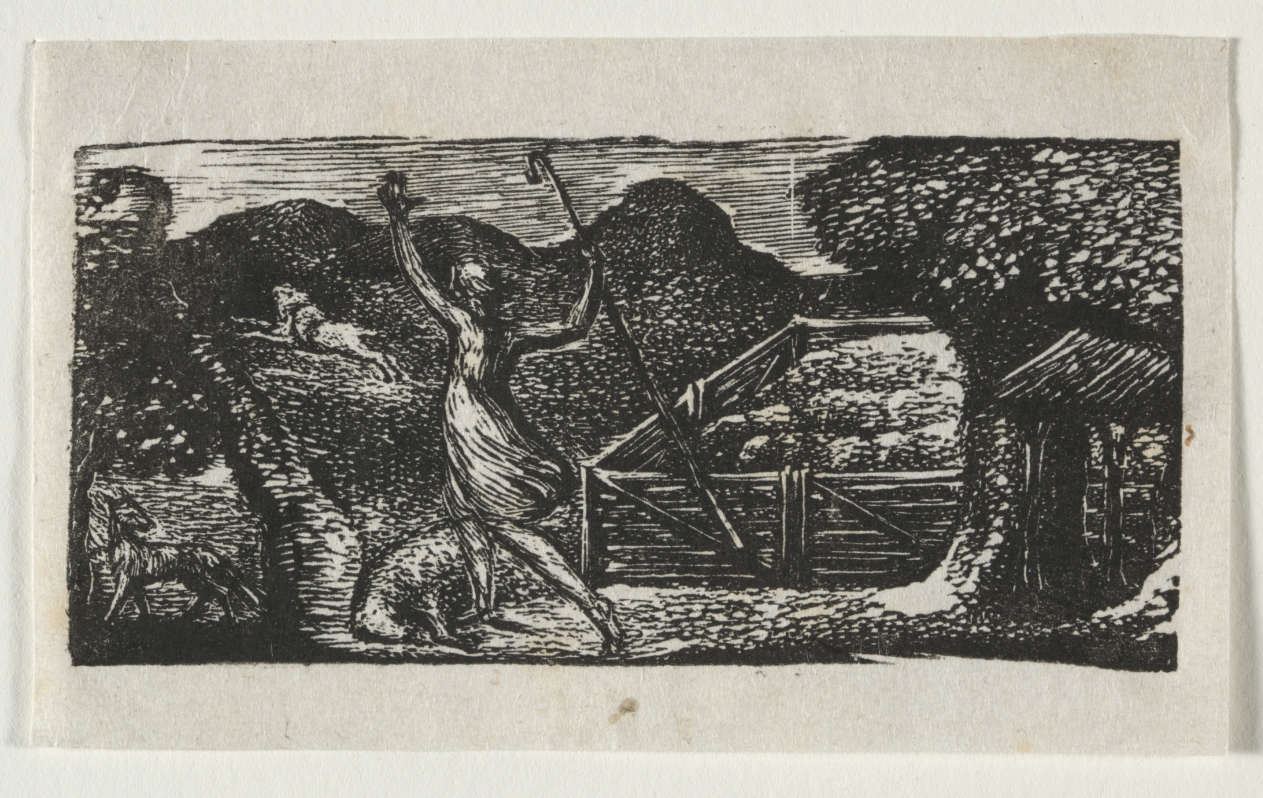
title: The Pastorals of Virgil, Eclogue I: The Shepherd Chases away a Wolf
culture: England, 19th century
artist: William Blake (British, 1757–1827)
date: 1821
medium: wood engraving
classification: Print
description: William Blake conceived and engraved 17 designs for Dr. Robert John Thornton’s The Pastorals of Virgil, a popular schoolbook used in teaching Latin. The publication included translations of poems by ancient Roman author Virgil that focus on a rural setting as both a subject matter and as the background for discussions of various issues, from love to politics. Blake’s illustrations reveal his emphasis on the natural world. As his only wood engravings, they also show how the process entails cutting away from the woodblock to create lighter sections, in essence working in white over a black background. Here, several areas—such as the textures of the trees—emphasize that point.